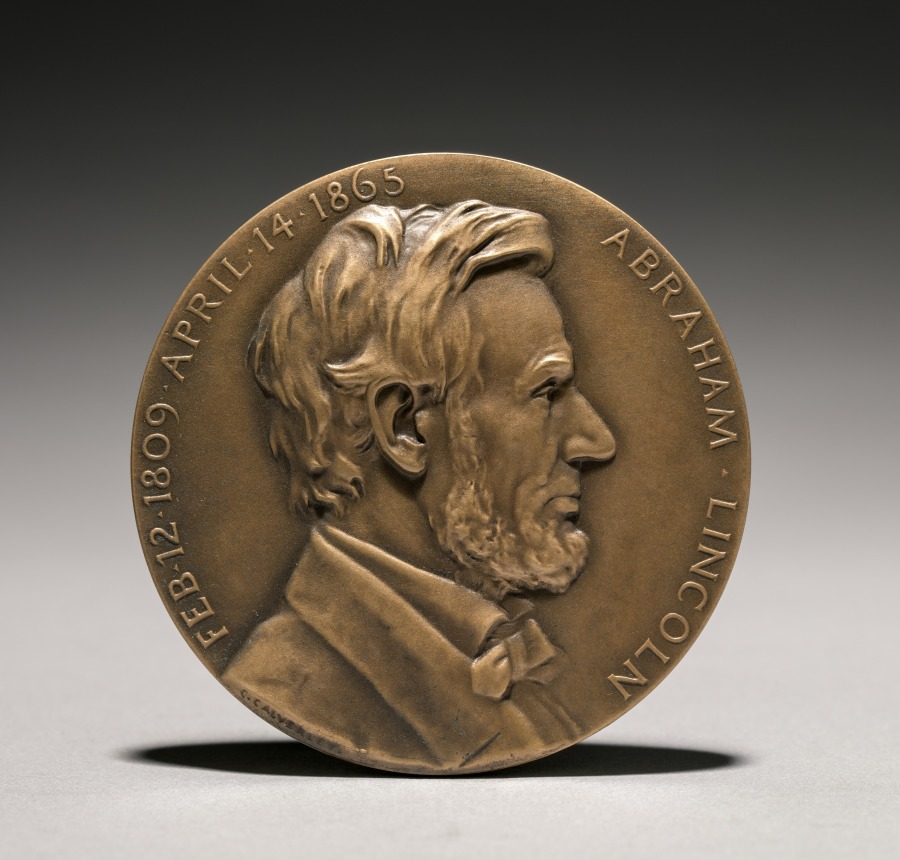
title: Abraham Lincoln Medal (obverse)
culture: America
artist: Charles Calverley (American, 1833–1914)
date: 1900s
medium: bronze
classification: Metalwork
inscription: right-hand side: "FEB.12.1809 APRIL.14.1865"; left-hand side: "ABRAHAM LINCOLN." Below: "C. Calverley."